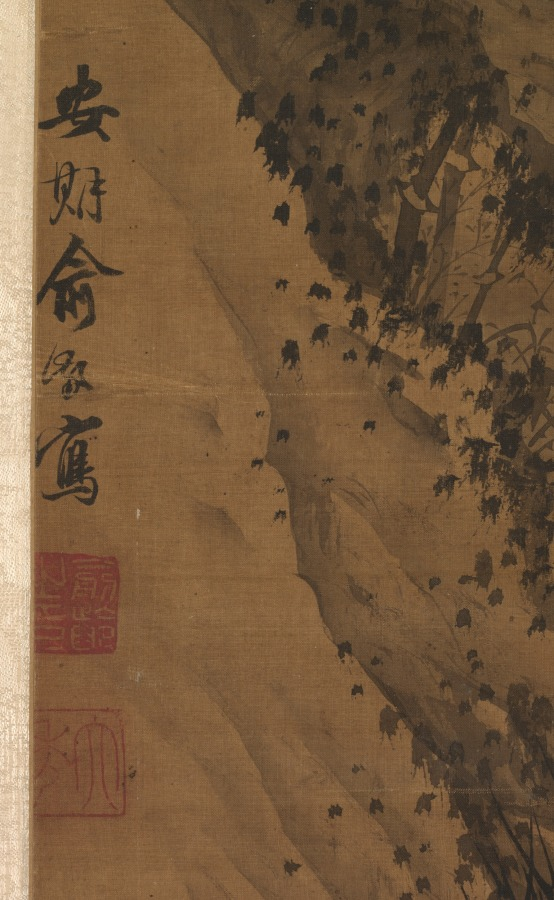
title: The Seven Worthies of the Bamboo Grove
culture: China, Qing dynasty (1644-1911)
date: 1644–1911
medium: hanging scroll, ink and slight color on silk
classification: Painting